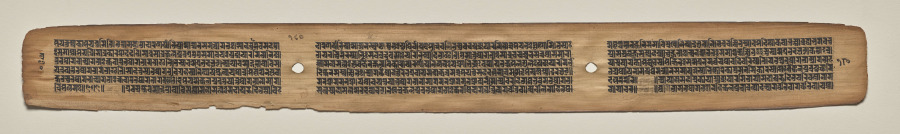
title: Text, folio 180 (verso), from a Manuscript of the Perfection of Wisdom in Eight Thousand Lines (Ashtasahasrika Prajnaparamita-sutra)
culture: Eastern India, Bihar, Vikramashila Monastery. Painting: Nepal, Kathmandu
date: Sunday, September 14, 1119 (year 239 of the Newar Samvat in the month of Ashvina)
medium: gum tempera and ink on palm leaves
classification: Painting